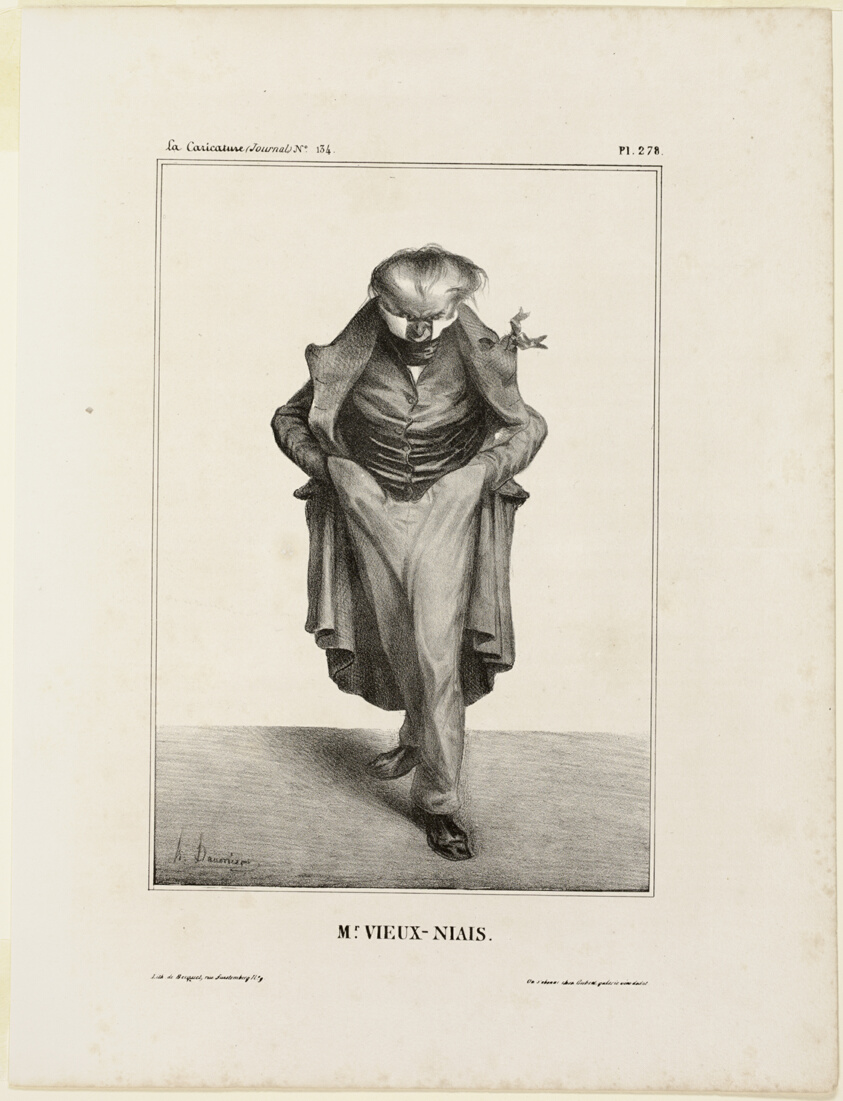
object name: Print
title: Mr. Vieux-Niais, plate 278 from Célébrités de la Caricature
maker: Honoré Victorin Daumier; French, 1808-1879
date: 1833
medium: Lithograph in black on ivory wove paper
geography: France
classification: lithograph; print; prints and drawing